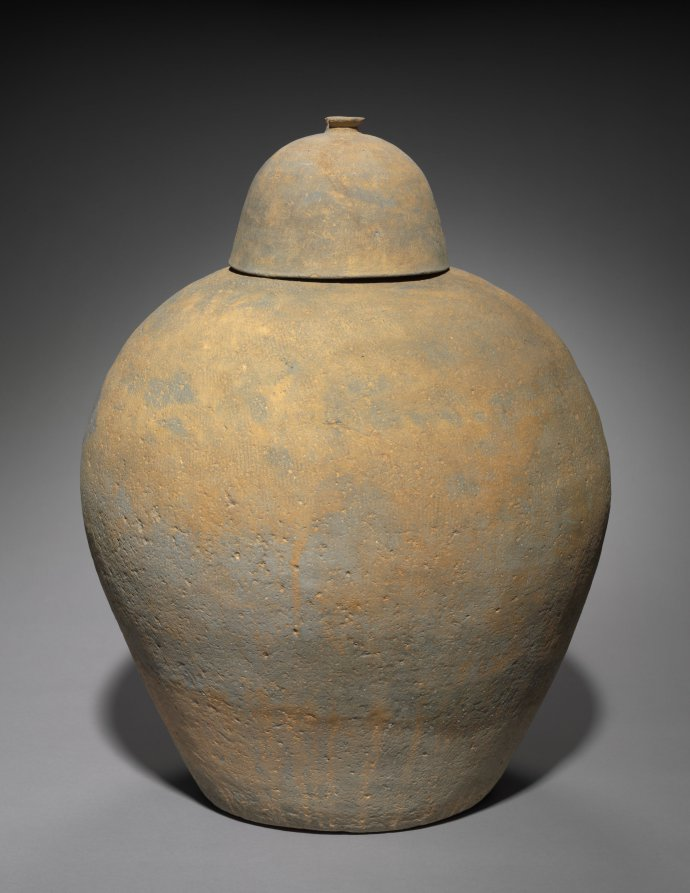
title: Burial Urn with Cover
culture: Korea, Three Kingdoms period (57 BCE–668 CE)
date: 300s–500s CE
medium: earthenware with impressed design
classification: Ceramic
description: Produced in closed kilns built on hillsides during the Three Kingdoms period, this lidded jar once contained the cremated remains of the dead. This type of burial jar became widespread after the introduction of Buddhism, as cremation became a common practice in Korea.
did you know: Closed kilns built on hillsides became widely used for producing this type of pottery vessel in Korea during the Three Kingdoms period.